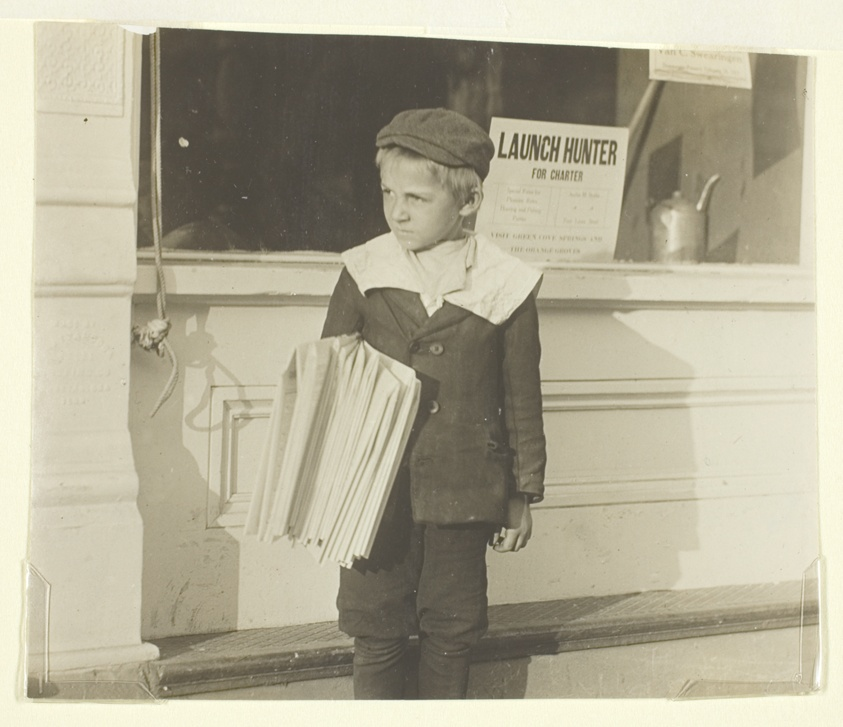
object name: Photograph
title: Jacksonville, Florida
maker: Lewis Wickes Hine (American, 1874–1940)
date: c. 1910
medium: Gelatin silver print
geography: United States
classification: gelatin silver (developing-out-paper) pr; photographic process; photography; photograph